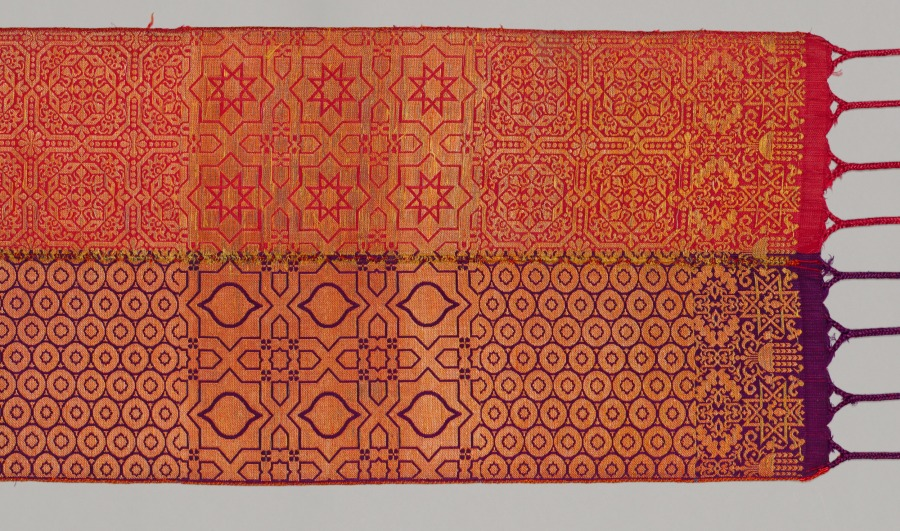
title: Belt (Hizam)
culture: Africa, North Africa, Morocco, Fes, Moroccan weaver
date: 1800s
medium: Silk, dye, metal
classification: Textile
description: Elaborate wedding sashes woven in Fez, Morocco, are distinctive for their multiple colors, designs, and uses. Folded lengthwise, they are wrapped around the waist so that the colors and designs coordinate with the attire worn during and after a wedding. Typically, the colors vary on each half although the designs are the same. Luxury textiles with elaborate patterns were woven on large looms called drawlooms that automatically repeated designs. The weaver operated the structure, inserting horizontal wefts, while the drawboy activated the programmed pattern. However, this wedding sash has ten programmed designs, which required considerable expertise.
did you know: Women sometimes added starch to stiffen these belts.